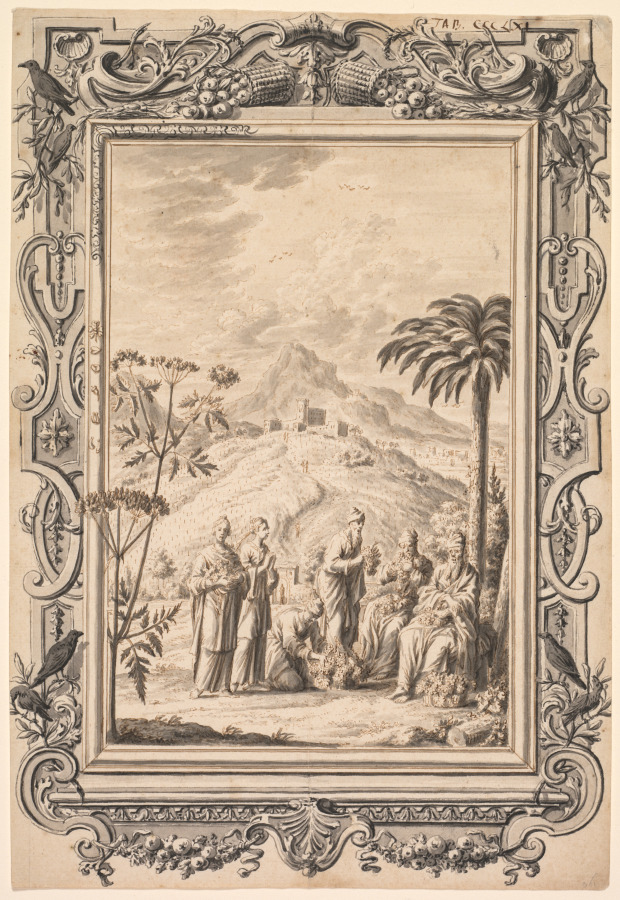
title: Illustration and Border Design for Kupfer-Bibel (Copper Bible)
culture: Switzerland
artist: Johan Melchior Füssli (Swiss, 1677–1736)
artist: Johann Daniel Preissler (German, 1666–1737)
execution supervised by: Johann Jacob Scheuchzer (Swiss, 1672–1733)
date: c. 1730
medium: Pen and brown ink and gray wash (illustration); pen and black ink and gray wash (border design)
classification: Drawing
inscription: Border Design: inscribed, upper right in brown ink: TAB. CCCLXI